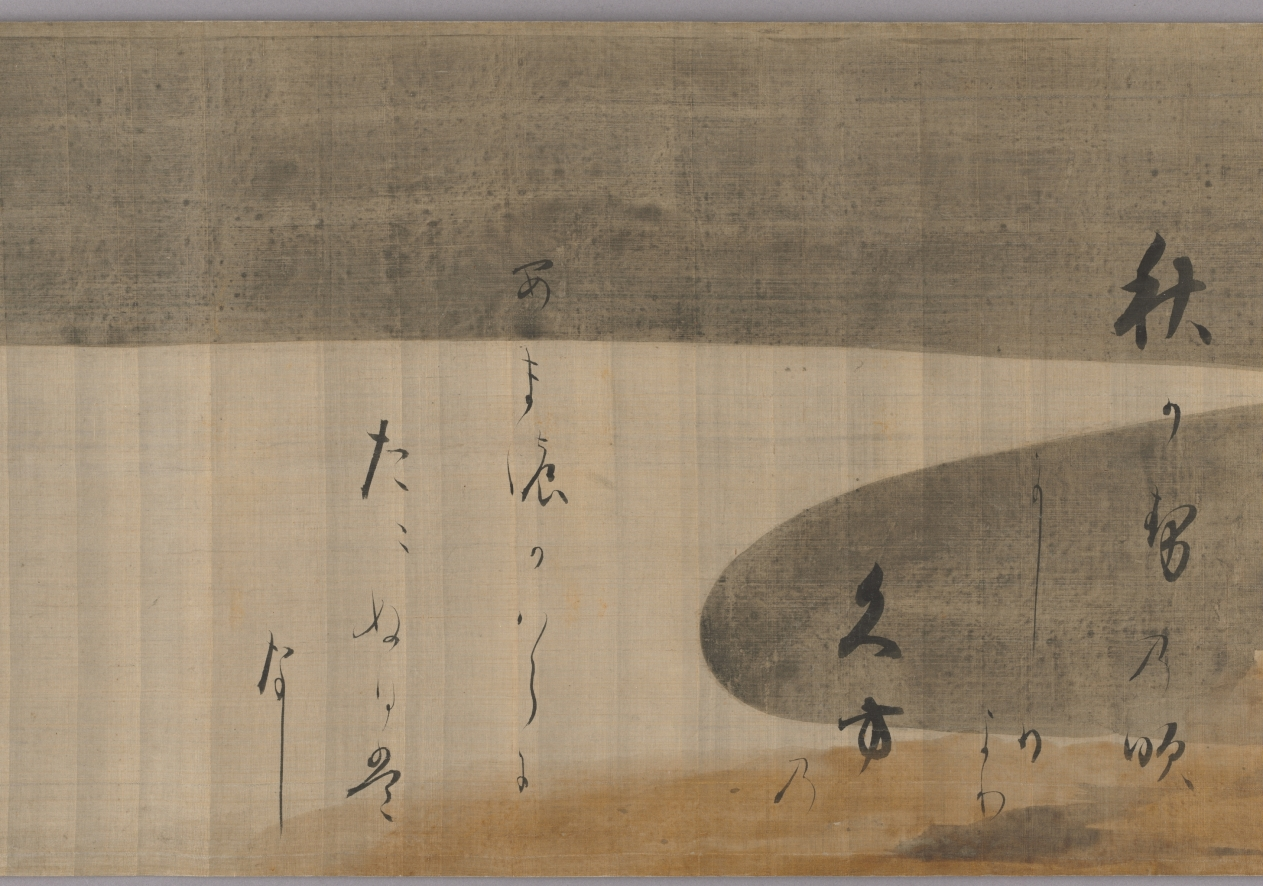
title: Selections from the Collection of Japanese Poems from Ancient and Modern Times (Kokin wakashū) with Design of Pines Along the Shore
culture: Japan, Momoyama period (1573-1615) to Edo period (1615-1858)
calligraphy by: Hon'ami Kōetsu (Japanese, 1558–1637)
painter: attributed to Tawaraya Sōtatsu (Japanese, c. 1570–c. 1640)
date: 1600s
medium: handscroll; ink on silk with gold and silver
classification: Calligraphy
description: The calligrapher and craftsman Hon’ami Kōetsu frequently collaborated with Tawaraya Sōtatsu, a painter who ran a studio that produced fans and screens. Sōtatsu’s work featured abstracted and flattened shapes, fields of color and gold, and asymmetry. In particular, motifs that appeared in small scale, such as flora and fauna, in early decorated Japanese papers were painted in a larger scale—blown up as if seen under a magnifying glass. For this handscroll, Kōetsu brushed poems from the autumn section of a poetry anthology onto silk with a landscape of pines in gold and silver likely painted by Sōtatsu.